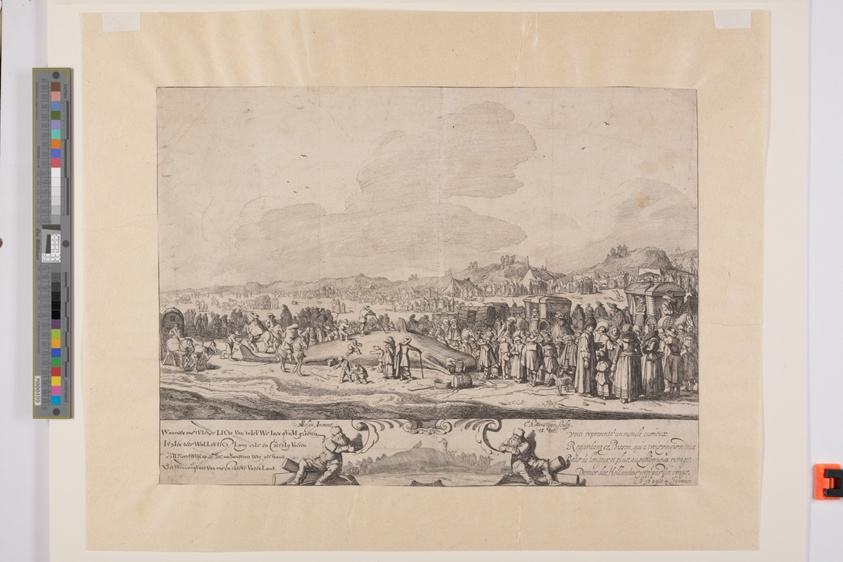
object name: Print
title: The Cachalot Stranded between Noordwijk and Zandvoort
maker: Cornelis van Kittensteyn (Dutch, c. 1598–c. 1652); after Pieter Molijn (Dutch, 1595-1661)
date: c. 1629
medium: Engraving on ivory laid paper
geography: Netherlands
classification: print; paper; prints and drawing; engraving